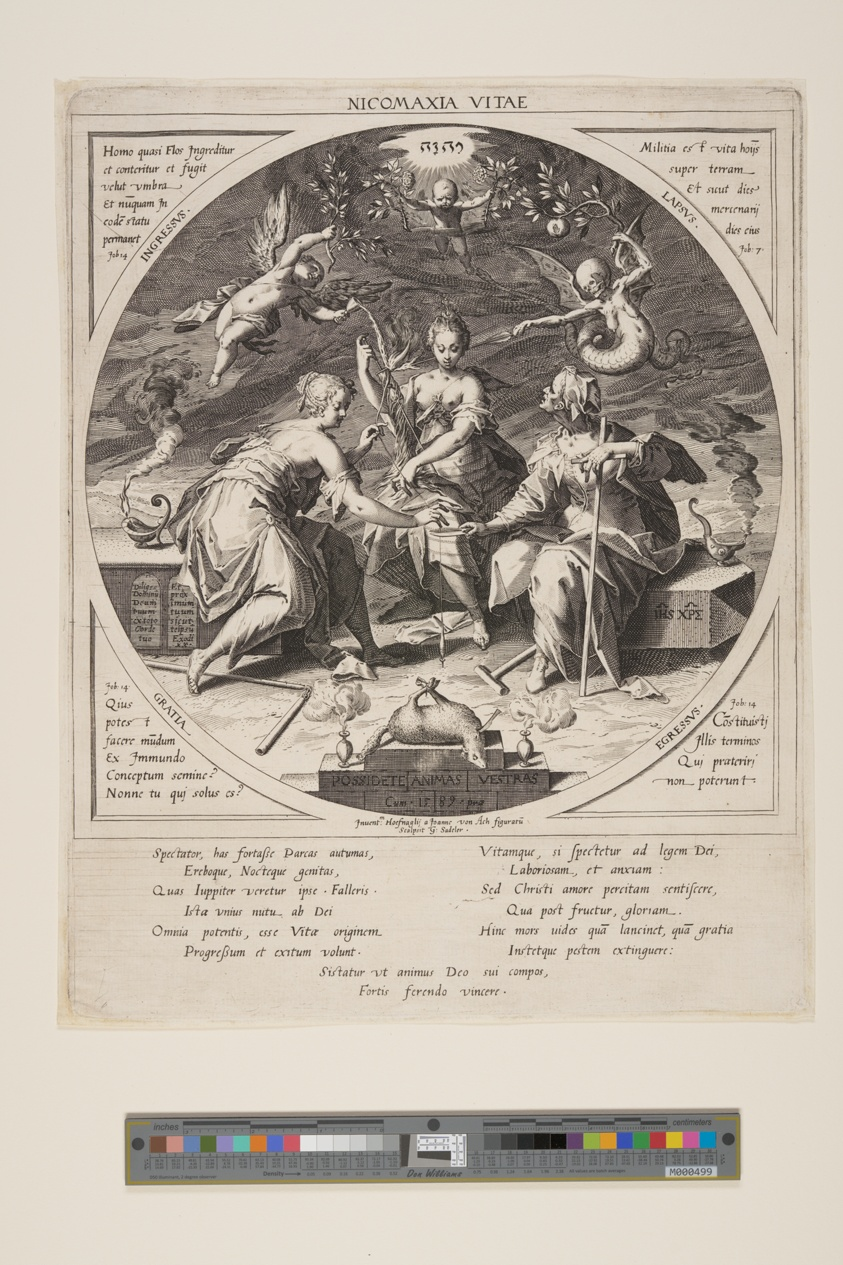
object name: Print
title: The Three Fates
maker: Aegidius Sadeler II (Flemish, c. 1570–1629); after Joris Hoefnagel (Flemish, 1542-1601) and Hans von Aachen (German, 1552-1616)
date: 1589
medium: Engraving on ivory laid paper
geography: Flanders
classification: engraving; paper; print; prints and drawing